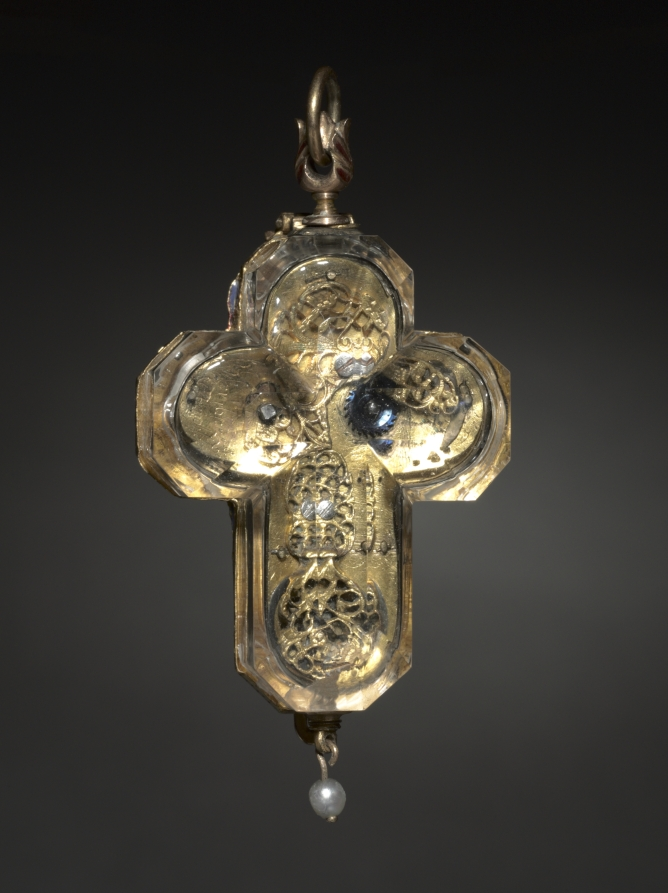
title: Cross-Shaped Clock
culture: France, 16th century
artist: P. Herbier (French)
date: c. 1580–1600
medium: enameled gold, rock crystal, and a pearl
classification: Jewelry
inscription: inscribed: P. Herbier, Grenoble.